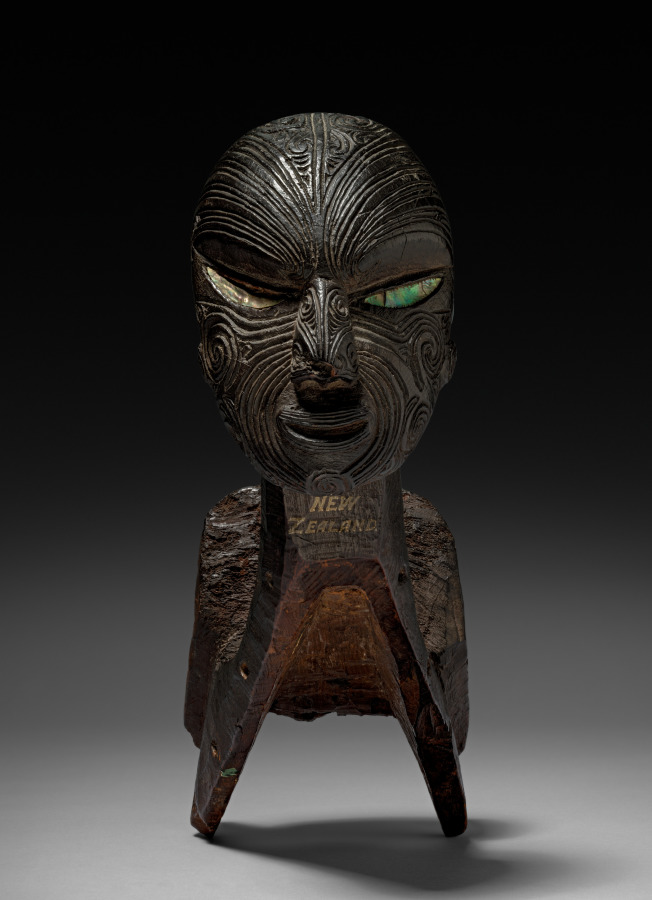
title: Fishing Canoe Prow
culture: Polynesia, New Zealand, Maori people, 19th century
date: 1800s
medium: wood with haliotis (pearl) shell inlay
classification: Sculpture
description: Intricate surface patterning characterizes Maori wood carvings. The swirls and spirals covering the face on this canoe prow replicate traditional facial tattoo patterns. Similar designs were used for post and gable figures that adorned both dwellings and compounds.